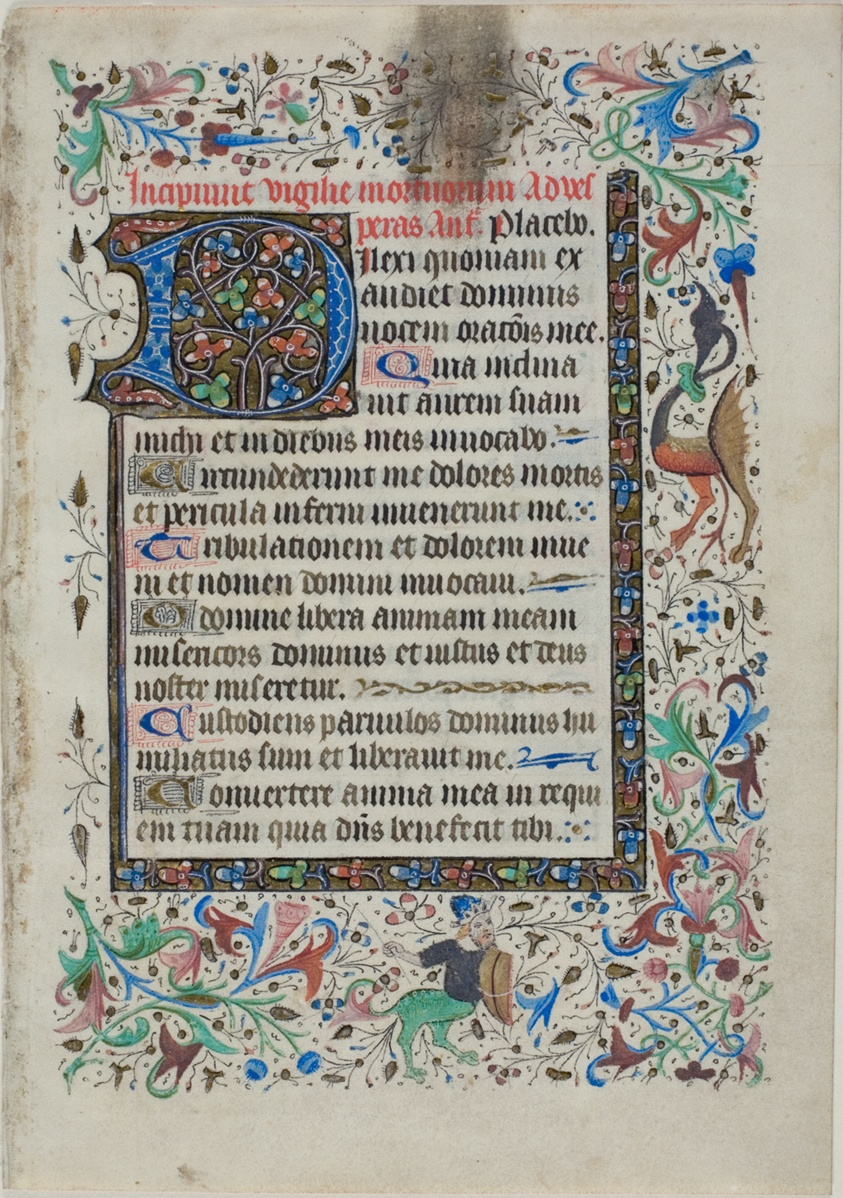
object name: Drawing and Watercolor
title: Text Leaf from a Book of Hours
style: medieval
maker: French (possibly Loire Valley)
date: c. 1430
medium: Manuscript cutting with decorations in tempera and gold leaf, and gothica textualis inscriptions in Latin in black ink, ruled in red, recto and verso, on parchment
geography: France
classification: tempera; manuscript; drawings (visual works); prints and drawing